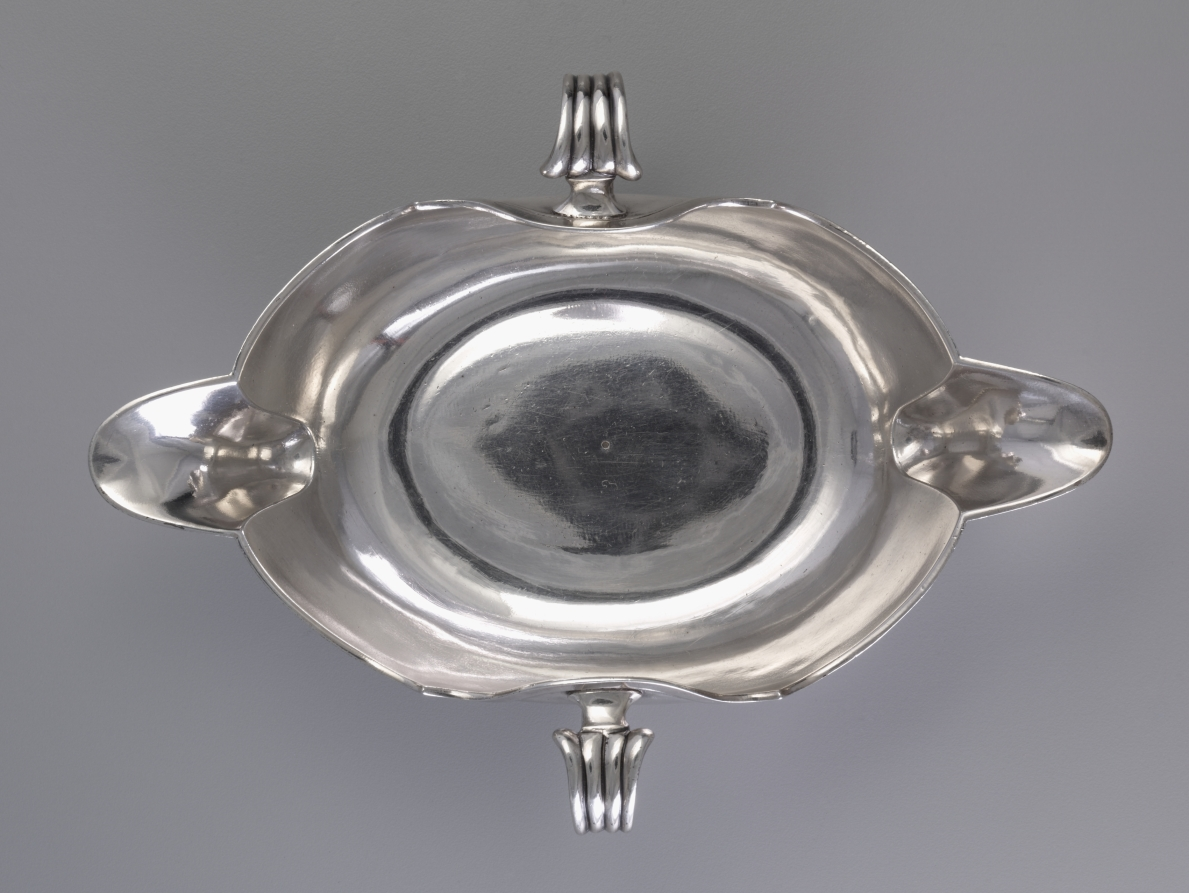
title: Sauce Boat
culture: France, Paris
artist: Nicolas Duclos (1699–1755), master silversmith in 1726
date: 1743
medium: silver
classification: Silver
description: When heated sauces began to be served separately from meat and fish towards the end of the 17th century, sauce boats began to be used as another piece of elaborately designed silver dinner services popular in European courts. This sauce boat reflects early models in the shape of a nef, a condiment vessel which derives its name from a ship of the same shape.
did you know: This sauceboat would likely have been accompanied by a tray and a spoon used to skim grease from the surface of the sauce.